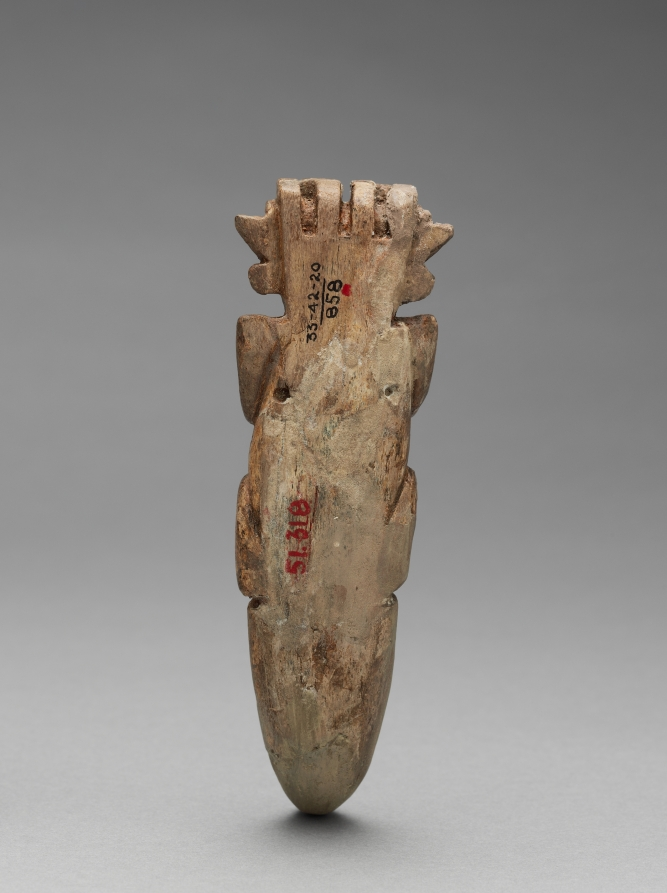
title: Ornament from Sitio Conte: Animal Pendant(?)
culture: Panama, Conte style, 5th - 10th century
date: c. 400–900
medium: manatee bone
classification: Jewelry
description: Harvard archaeologists excavated the eight ornaments in this case from several burials at Sitio Conte, a cemetery famous for its lavish graves of powerful chieftains. The young man buried in Grave 26 was such a chief. His status was stunningly memorialized by 21 human companions and 475 objects, many of them personal ornaments made of gold, including the large chest plaque (no. 2) and the rod-shaped ear ornament (no. 3) shown here. The creature on the chest plaque, found close to the chief’s body, has reptile claws and perhaps the head crest of an iguana. Its meaning is unknown but perhaps, as in later periods, reptilian imagery and the warm gleam of gold linked rulers with the sun’s creative force.